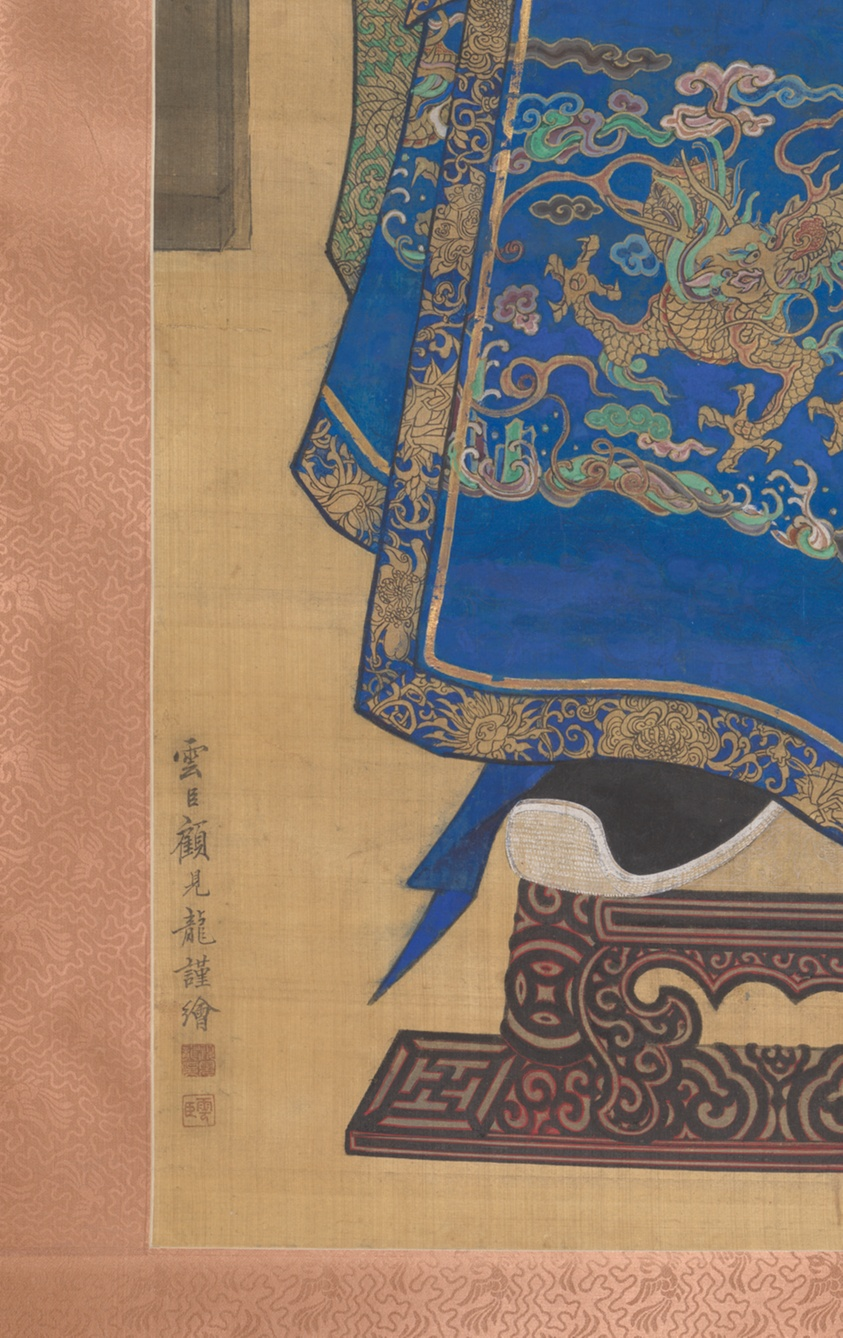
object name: Painting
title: Portrait of a Manchu Prince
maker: Gu Jianlong (Chinese, 1606-1691)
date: Qing dynasty (1644-1911), 17th century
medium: Hanging scroll; ink and color on silk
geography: China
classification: painting